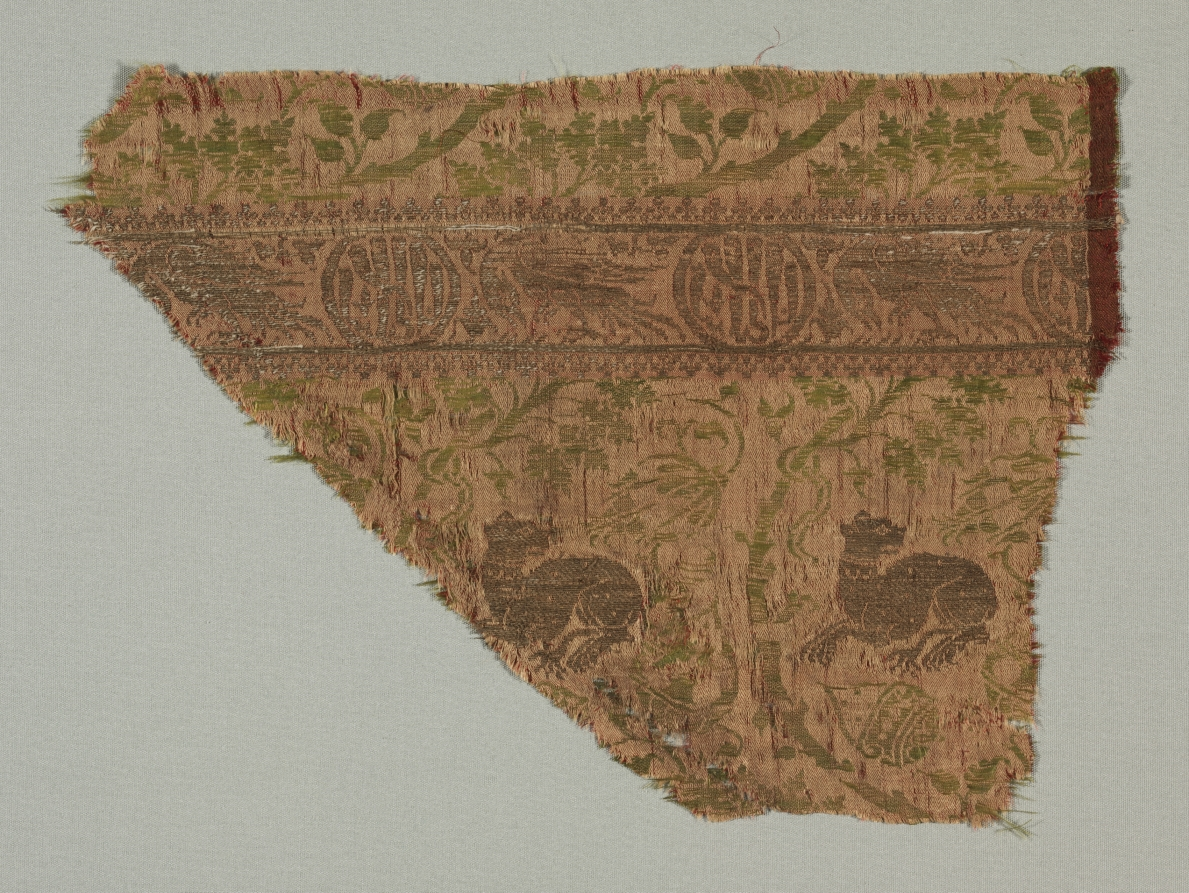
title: Silk Fragment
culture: Italy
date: 1350–99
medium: Silk and gold thread: lampas weave, brocaded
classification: Textile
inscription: oval cartouches contain arabic in distorted Naskhi: "al-sultan."